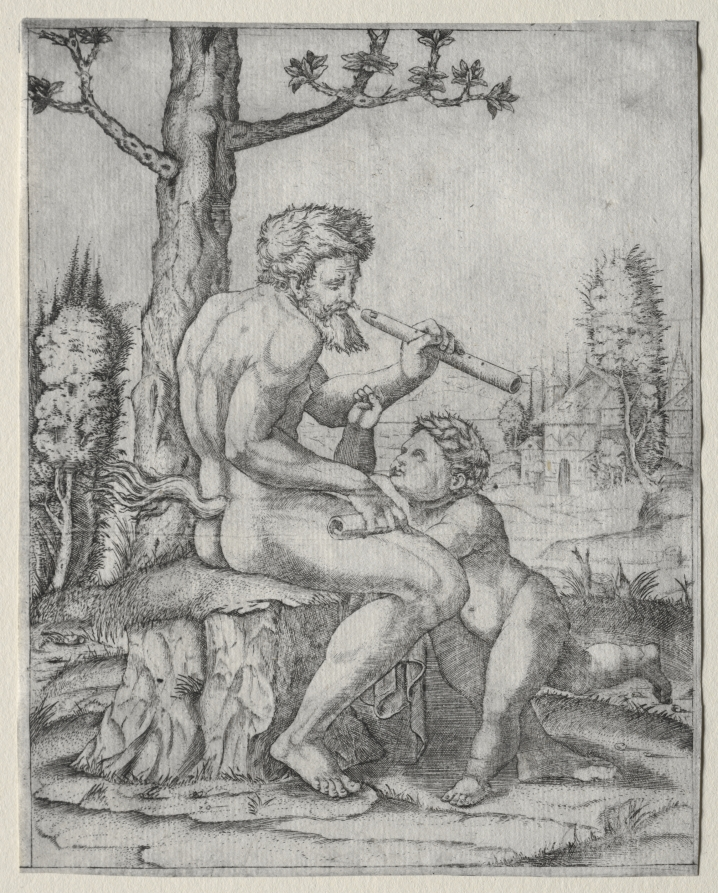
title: Faun and Child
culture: Italy, 16th century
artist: Marcantonio Raimondi (Italian, 1470/82–1527/34)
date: c. 1509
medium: engraving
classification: Print